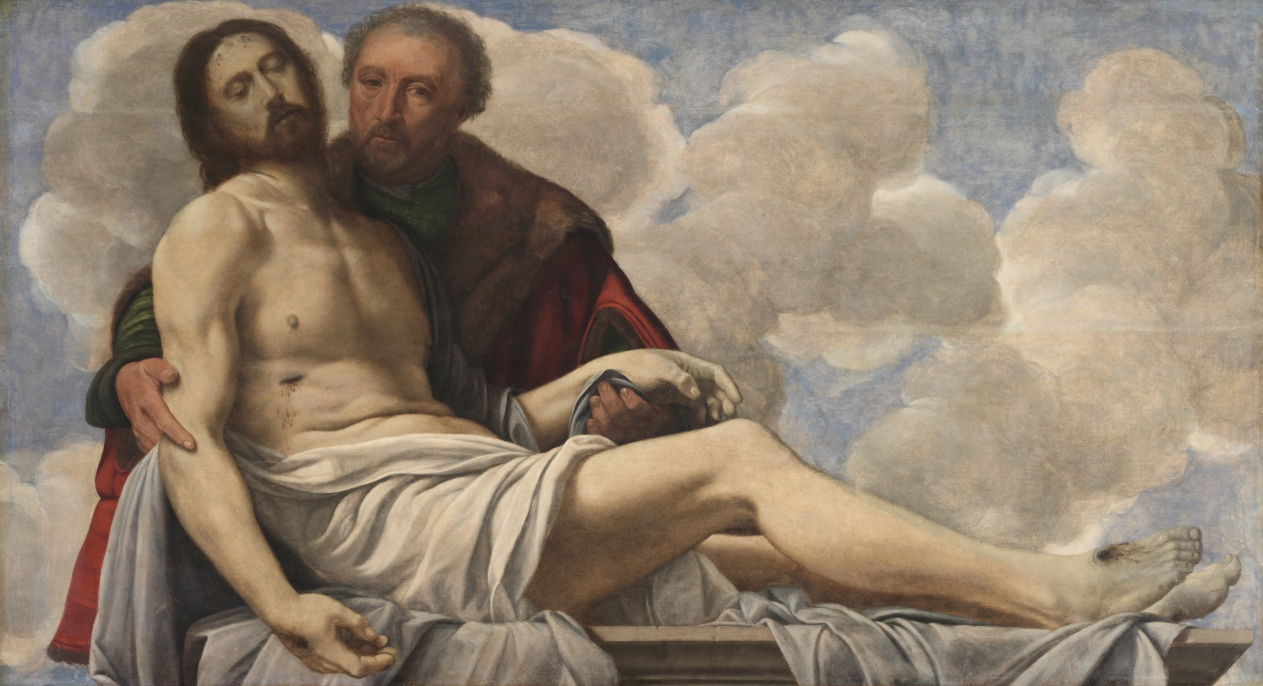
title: Christ with Joseph of Arimathea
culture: Italy, 16th century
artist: Giovanni Girolamo Savoldo (Italian, c. 1480–after 1548)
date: c. 1525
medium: oil on wood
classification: Painting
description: After the Crucifixion, Joseph of Arimathea obtained permission to bury Christ’s body in Joseph’s own tomb. Aside from an amorphous, cloudy sky, Savoldo eliminated the background entirely and reduced the narrative to two monumental figures, brought to the front of the picture plane. These qualities surely had a great impact on Caravaggio, who initially trained in Northern Italy, where Savoldo spent his career. This work originally hung over a large altarpiece, which explains the unusual perspective, the panel’s horizontal shape, and the figures’ position above the viewer.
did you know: This panel originally crowned the largest painting Savoldo ever made for a public setting.